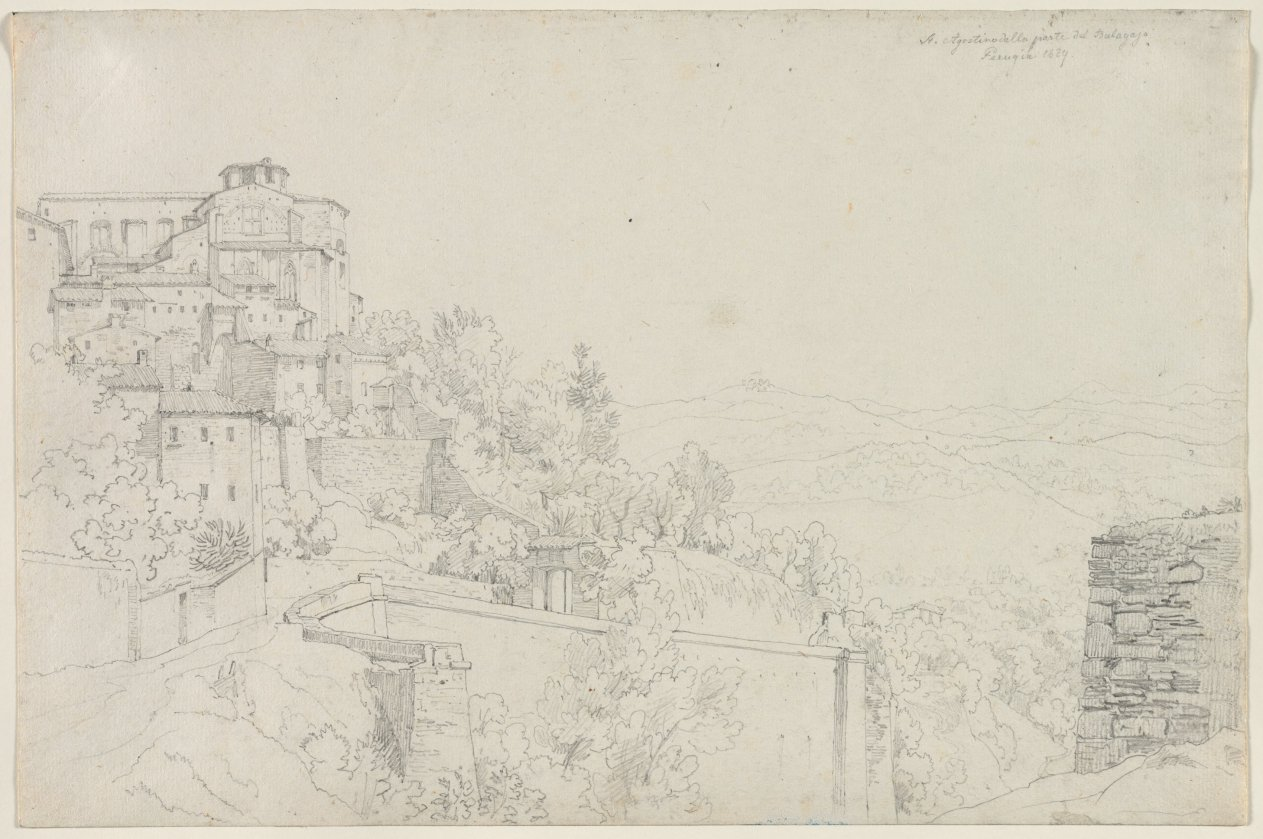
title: Saint Agostino from Bulagajo, Perugia (San Agostino dalla parte del Bulagajo, Perugia)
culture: Austria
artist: Edward Jakob von Steinle (Austrian, 1810–1886)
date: 1829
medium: graphite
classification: Drawing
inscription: [by artist?], upper right, in graphite: St. Agostino dalla parte del Bulagajo / Perugia 1829 ; by artist, center right, in hills: [numerals] ; VERSO, upper center, in graphite: 1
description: An early work by Steinle, this drawing dates from the beginning of the artist’s sojourn in Rome (1828-3). Steinle belonged to the second generation of Nazarenes, a group of young artists who had seceded from Vienna’s academy and committed themselves to the revival of 15th and 16th-century German and Italian art through themes derived from historical and religious sources. Calling themselves the Brotherhood of Saint Luke, they moved to Rome, studied Catholicism, and executed stylized images that recalled the visual sensibility of Renaissance engravings. This view of Saint Agostino and the surrounding landscape is in keeping with the Nazarene’s aesthetic, to which Steinle adhered troughout his career.